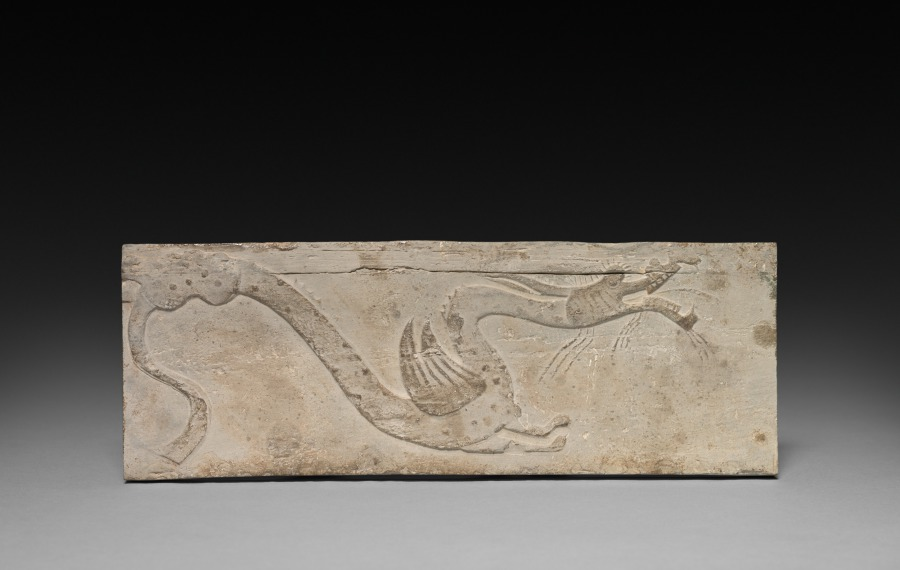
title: Relief with Dragon from a Funerary Stove Model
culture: China, from a tomb in Xi'an, Shaanxi province, Han dynasty (202 BCE–220 CE)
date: 202 BCE–220 CE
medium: earthenware with relief decoration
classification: Ceramic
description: Han dynasty tombs were often furnished with grave goods to provide the deceased with items for the afterlife. This panel with a dragon was part of a miniature pottery stove to be placed in a burial chamber. The dragon is an auspicious creature and an animal of the cardinal directions that protects the east.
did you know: Han dynasty tombs were often furnished with grave goods to provide the deceased with items for the afterlife.